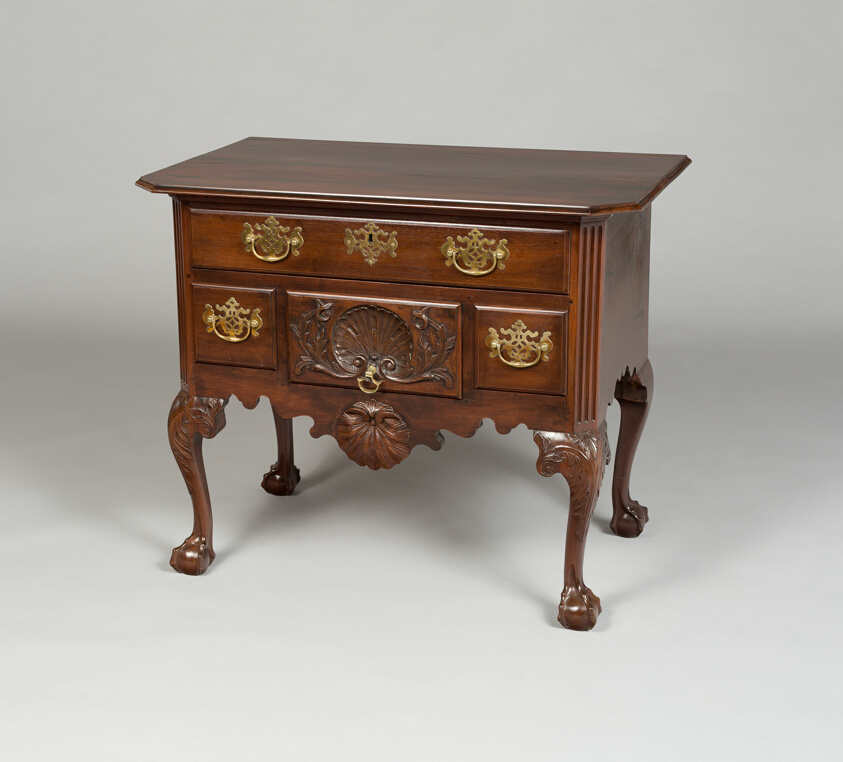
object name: Furniture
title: Dressing Table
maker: Artist unknown (American, 18th century); Maryland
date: 1755–90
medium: Mahogany, yellow pine, yellow poplar, and Atlantic white cedar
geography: Maryland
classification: table; furniture; american decorative arts; american arts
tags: furniture